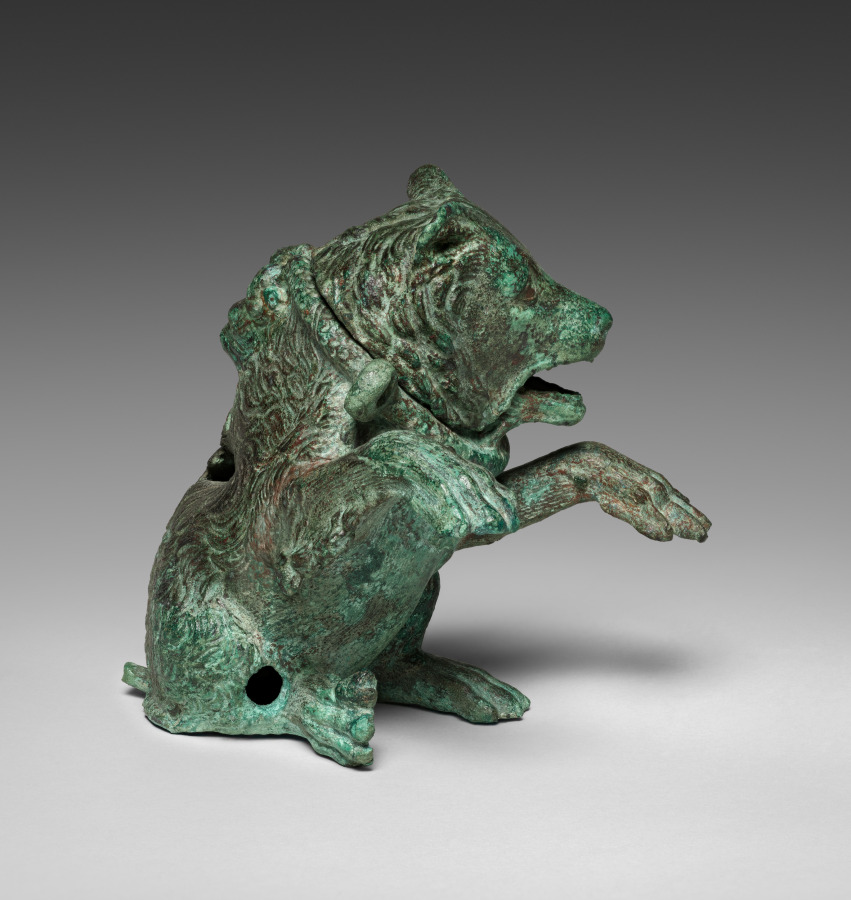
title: Oil Ampulla in the Form of a Dancing Bear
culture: Italy, Roman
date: 200s CE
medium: bronze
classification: Sculpture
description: This bronze bear sits on its hindquarters with its front paws raised, head slightly turned left, and mouth gaping open. It wears a collar around its neck with two rings on either side, where a chain would be passed through to suspend the ampulla. The bear’s head is hinged at the back of the collar to open the vessel, with the lower jaw forming a spout. The eyes were once pierced to prevent an airlock within the ampulla. Bears, like many other animals in antiquity, were used as a form of entertainment, demonstrated here by the bear’s “dancing” pose.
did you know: This ampulla was likely used to carry oil to the baths in antiquity.